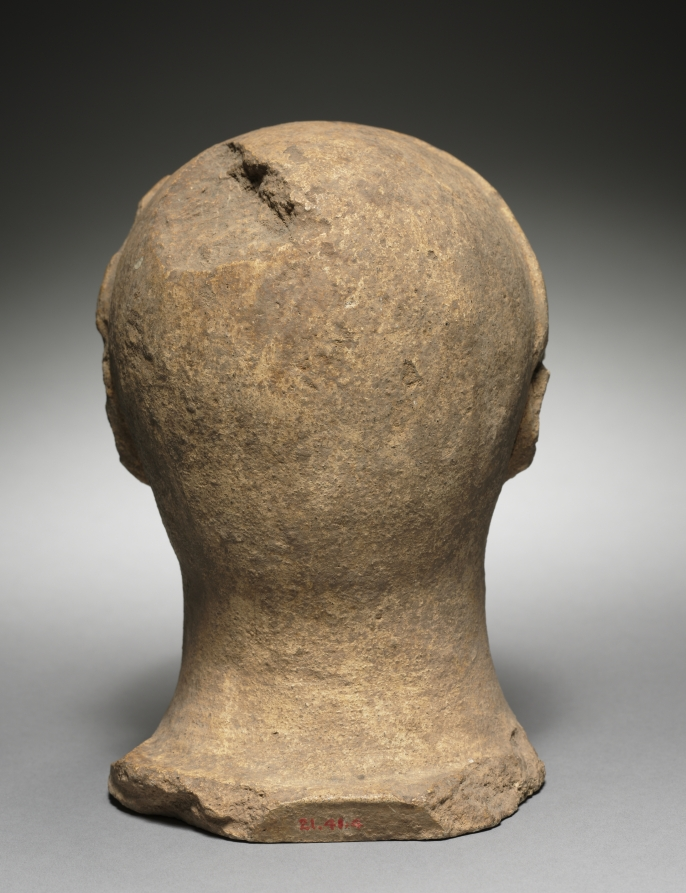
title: Head of a Woman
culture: Etruscan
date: 500–475 BCE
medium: terracotta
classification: Sculpture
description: Probably created for use as a votive dedication, or an offering to a deity, this mold-made female head tops a broad neck spreading into a flat base; no bust or body was intended. The wavy hair, parted in the center, drapes before the ears and beneath a simple headband, framing the face and emphasizing the frontal view. Although three-dimensional, the head is unworked on its back half.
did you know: This sculpture is an example of ancient mass production, as many identical heads could be made from one mold.